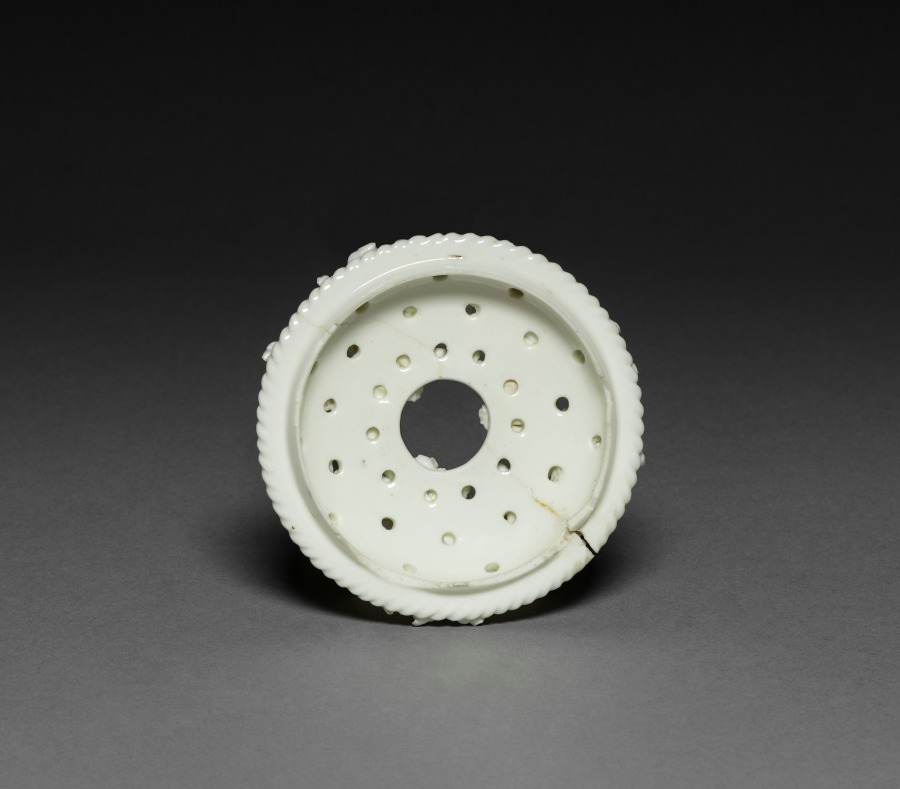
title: Cover for a Potpourri Vase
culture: France, Saint Cloud, 18th century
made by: Saint Cloud Porcelain Factory (French)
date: mid 1700s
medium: soft-paste porcelain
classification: Ceramic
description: This cover is part of a pair of covered vases that were created to contain potpourri, a mixture of flowers, herbs, and spices emitting ambient fragrance. This specific function offered a particularly fertile ground for the development of French porcelain, as manufactories experimented with forms, surface ornamentations, and placement of perforations.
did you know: Prior to Saint-Cloud's development of soft-paste porcelain in the 1690s, rumors spread throughout Europe that the prized material was made by burying a variety of materials, including lobster shells, in the ground for 80 years.